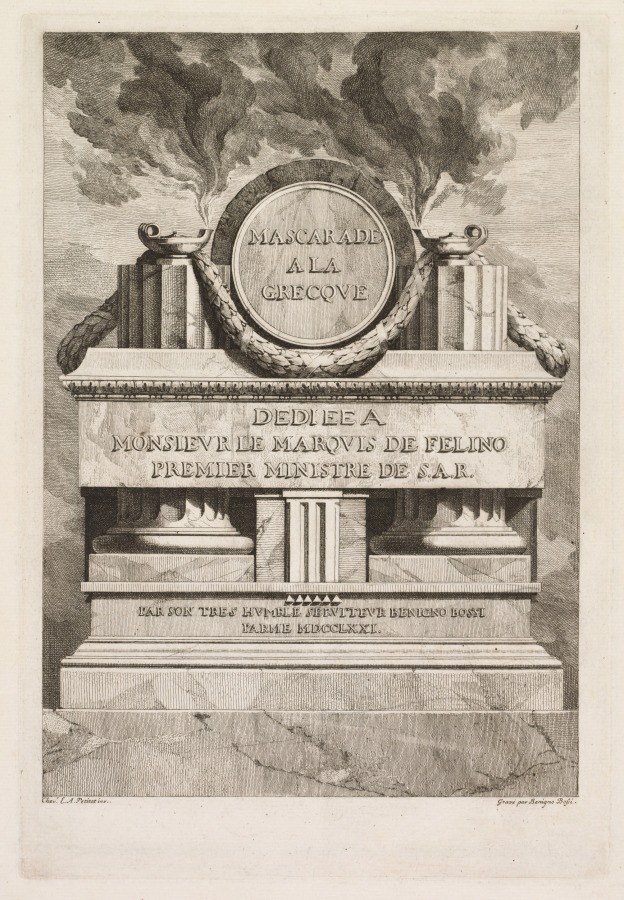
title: Mascarade à la Grecque: Dedication Page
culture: Italy, 18th century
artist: Benigno Bossi (Italian, 1727–1792)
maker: after Ennemond Alexandre Petitot (French, 1727-1801)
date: 1771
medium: etching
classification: Print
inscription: In plate: Mascarade à la Grecque / D'apres les deseins origineaux tirès du Cabinet / de Monsieur le Marquis de Felino Premier / Ministre de S. A. R. &c. / Un home distinguè par Sa naisance, celebre par Son / gout pour les arts, et Sa bienfaisance, en voyant le / Torrent de tout ce que la mode et la folie caracté- / risoient du Tiire à la greque, donna, en S'amusant / Sous un ton riasonnè et profound, quelques desseins d'- / habillements à la greque, il y'a quelques anneès, et leur / Supposa autant de facilitè que de raisons dans L'é- / xécution. / Ce Badinage à donnè lieu, dans un gout different, à / la petite collèction que l'on prèsente icy qui fut / une plaisanterie de Societè.